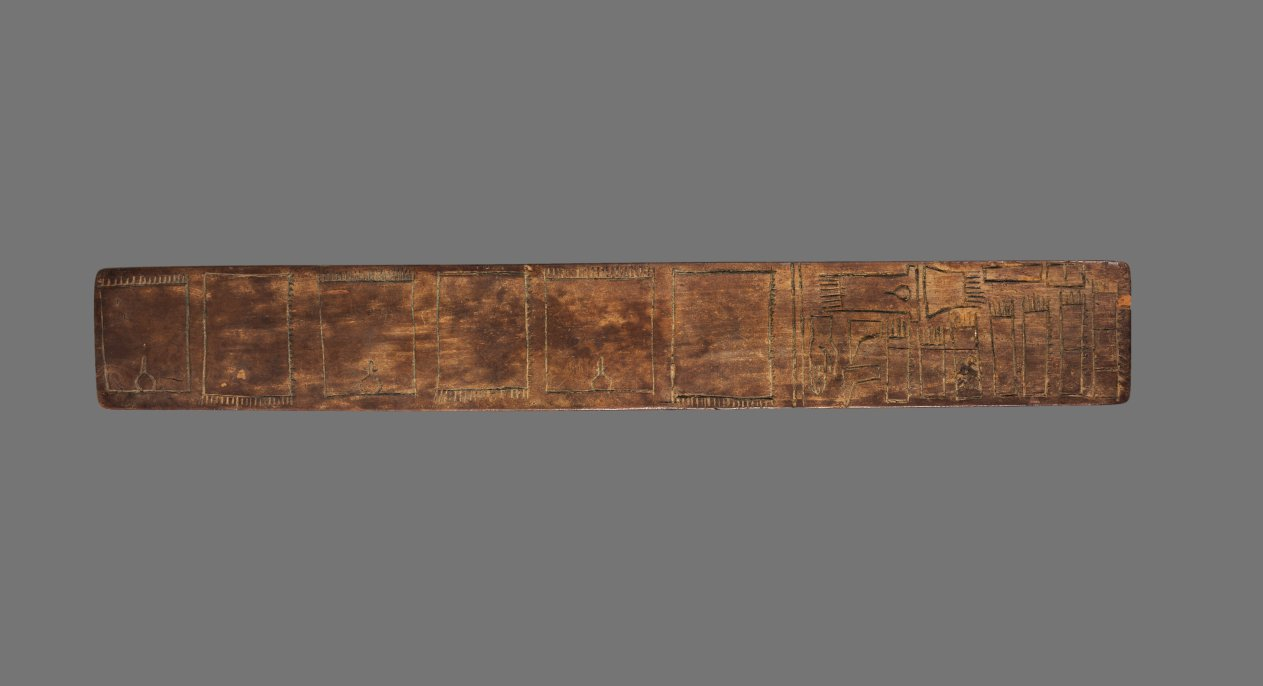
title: Scribe's Palette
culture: Egypt, New Kingdom (1540–1069 BCE), Dynasties 18–19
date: 1540–1186 BCE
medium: wood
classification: Implements